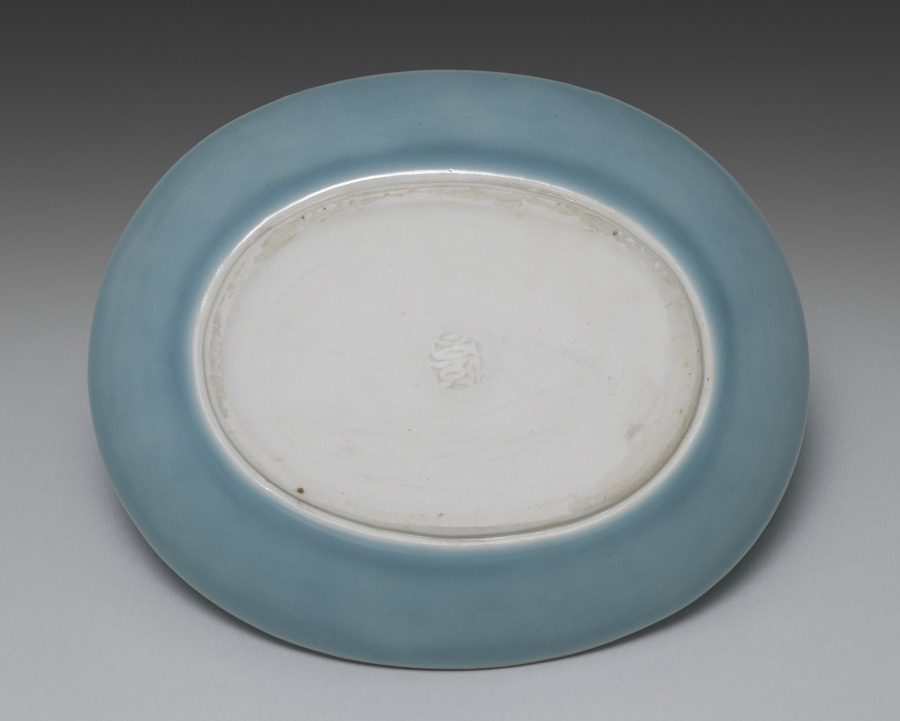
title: Dish from Dishes with Shells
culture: Japan, Taishō period (1912–26)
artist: Seifū Yohei IV (Japanese, 1872–1951)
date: 1914–46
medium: One from a set of five dishes; porcelain with blue glaze, iron oxide, and molded design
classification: Ceramic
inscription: 清風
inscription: 清風造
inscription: 清風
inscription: 成山清風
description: Yohei IV chose an aquatic theme for this set of five mukōzuke, side dishes. He added an iron oxide rim and used a concentrated blue glaze on both the interior and exterior. The glaze, named on the box lid, is his father’s “evening moon” (tsukiyoi) color. The conch in relief takes up the entire bottom of the dish. Up the sides are two snails on one end and on the other a scallop. This results in a boldly graphic, less realistic effect.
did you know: This set of dishes, mukōzuke, could be used for serving small side dishes at a tea gathering.